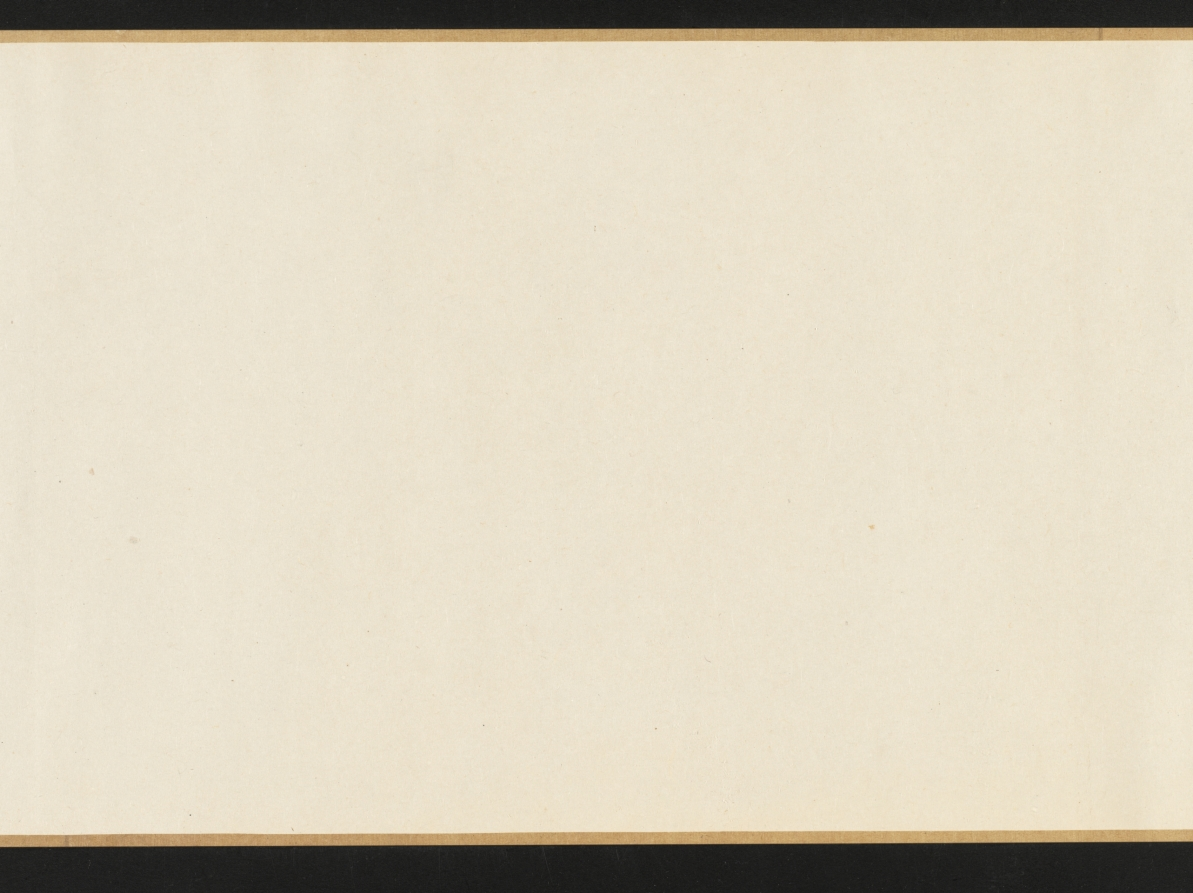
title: The Lantern Night Excursion of Zhong Kui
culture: China, Yuan dynasty (1271-1368)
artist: Yan Hui (Chinese, active 1270–1310)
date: late 1200s–early 1300s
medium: handscroll; ink and slight color on silk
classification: Painting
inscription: Artist's signature [and probable seal]: Yan Qiuyue 顏秋月 Title on frontispiece and 1 seal of Niu Shuyu 鈕樹玉 (1760–1827): Qiuyue mohuan 秋月墨幻 [Qiuyue's Ink Fantasy]. 31 additional seals: 2 of Yang Shiqi 楊士奇 (1365–1444); 2 of An Guo 安國 (1481–1534); 8 of Xiang Yuanbian 項元汴 (1525–1590); 2 of Geng Zhaozhong 耿昭忠 (1640–1686); 4 of Pu Tung 溥侗 (1870–1952); 7 of Tan Jing 譚敬 (1911–1991); 1 of Liu Ting-chih (20th c.); 5 unidentified.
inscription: An inscription by Zizhi Shanren 紫芝山人 [probably Jiang Hui 蔣惠], dated 1389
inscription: An inscription by Wu Kuan 吳寬 (1436–1504)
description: Here, the demon queller Zhong Kui leads a nightly procession of street entertainers with bare, muscular bodies and demonic faces. Some wear shabby clothes, and all perform stunts and tricks to astound and scare the viewer. In fact, a New Year custom in cities of southeast China had the poor, disguised as demons, process through the streets and play their tricks to clear households of evil spirits and welcome the spring. From right to left, a demonic figure leads the procession and beats a drum; another lifts a large rock; one stands on his hands trying to drink; one balances a jar on his elbow; three hold and wield weapons; one carries a folded chair covered by a cow’s skin; another holds Zhong Kui’s qin (zither), books, brush, and inkstone. At the end of the scroll, two figures offer a cup and bottle of wine to Zhong Kui, who lifts his hand in command.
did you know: Zhong Kui was an ancient ghostbuster.